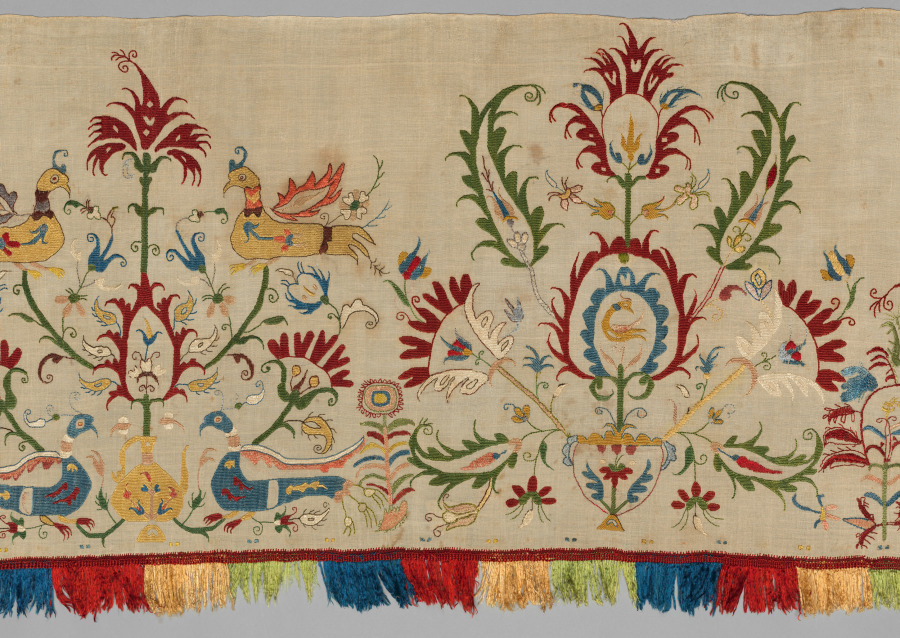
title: Side Panel of a Bedspread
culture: Greece, Sporades Islands, Skyros, 18th century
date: 1700s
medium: embroidery: silk on linen tabby ground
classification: Embroidery